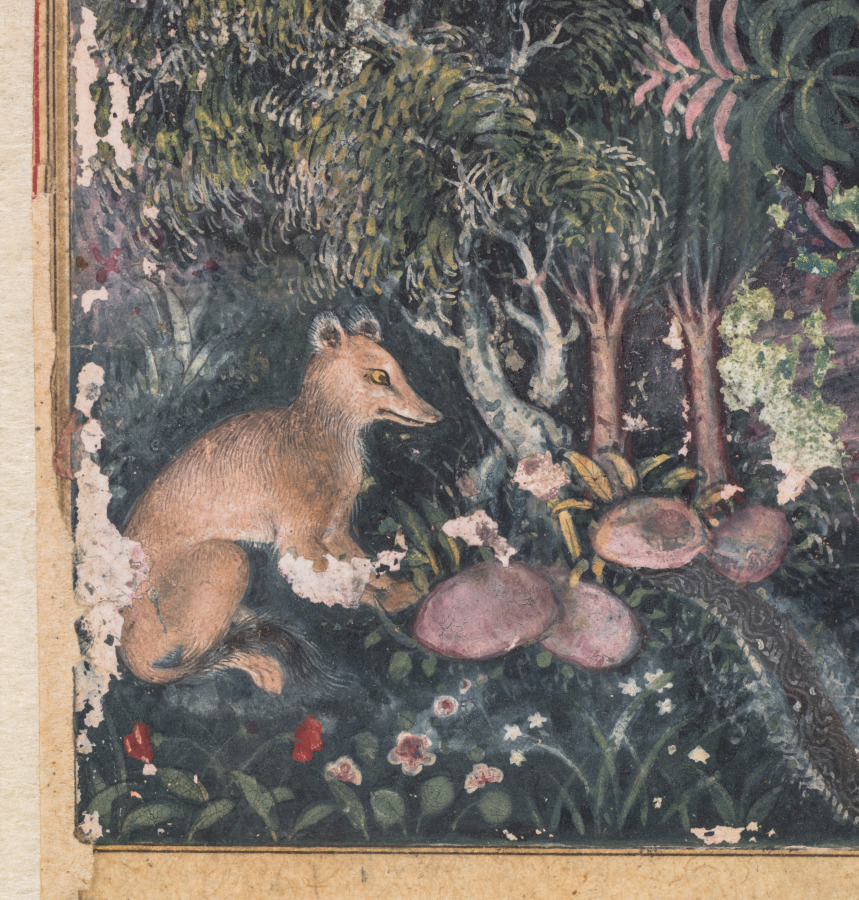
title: The hunter throws away the baby parrots, who pretend to be dead, and captures the mother, from a Tuti-nama (Tales of a Parrot): Fifth Night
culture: Mughal India, court of Akbar (reigned 1556–1605)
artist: attributed to Basavana (Indian, active c. 1560–1600)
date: c. 1560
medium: gum tempera, ink, and gold on paper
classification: Painting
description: Despite the chess-playing monkey’s grim end, the baby parrots continued to cavort with the fox cubs. One day the mother fox discovered that her cubs had been eaten by a panther. Blaming the parrots, she lured a hunter to their tree. The hunter climbed the tree and ensnared the mother parrot and her babies. The mother instructed her young to play dead, then pleaded with the hunter to take her alone, saying that since she knew the art of healing she would fetch a high price. Lush vegetation and a stream of water painted with a soft brush indicate a fresh new stylistic vision that represents a departure from Indian and Persian styles that came before.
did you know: The pink leaves are new shoots that have not yet turned green.